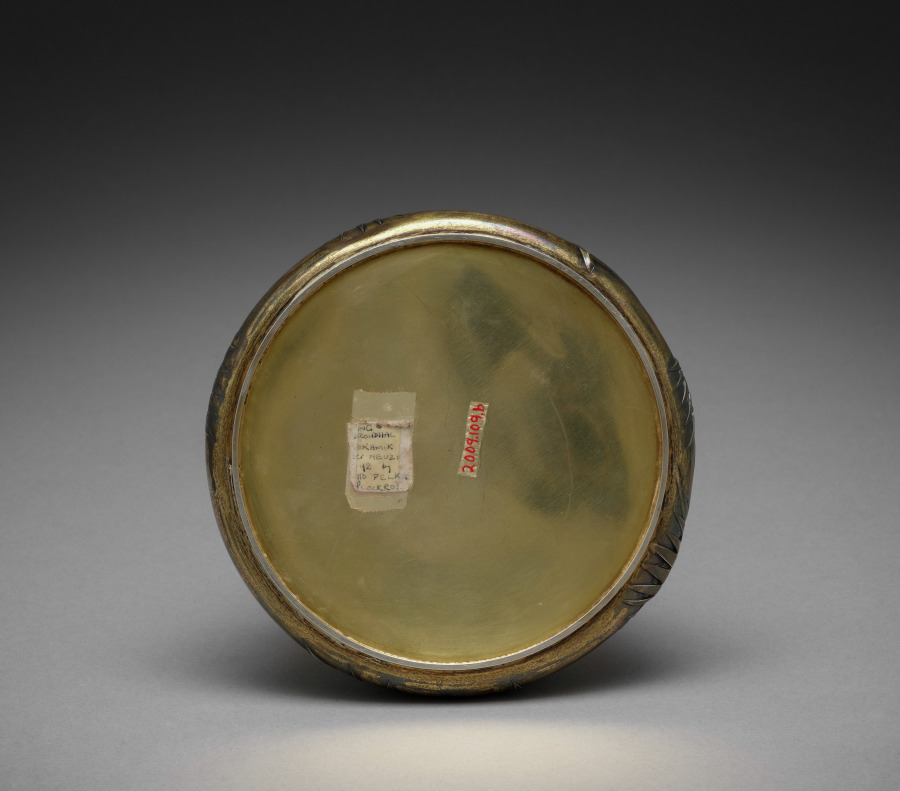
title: Box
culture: Sweden, 19th century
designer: Ingeborg Plockross-Iminger (Danish, 1872–1962)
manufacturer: Bing & Grøndahl (Danish, est. 1853)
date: c. 1850–1900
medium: porcelain, silver-gilt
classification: Sculpture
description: This figure featuring three monkeys was designed by the Danish ceramicist Ingeborg Plockross-Iminger. The figure is displayed with a French silver mount that references Japonisme and Art Nouveau styles that were popular at the end of the 1800s and experienced a resurgence in the 1920s because of increased importation of Japanese goods to the West.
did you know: This ceramic figure usually stands alone, without a silver mounting.